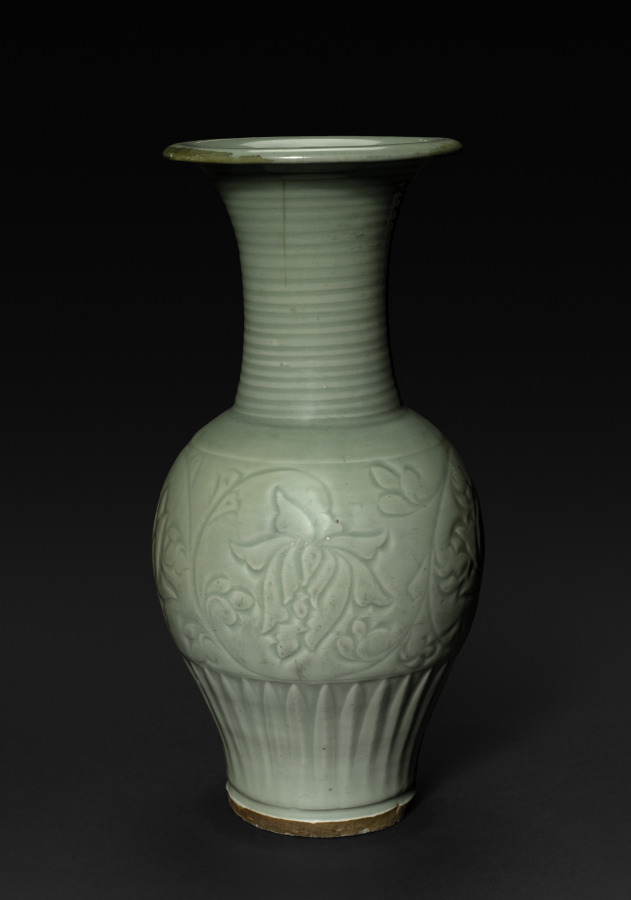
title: Vase: Celadon Ware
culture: China, Ming dynasty (1368–1644)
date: 1368–1644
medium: stoneware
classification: Ceramic